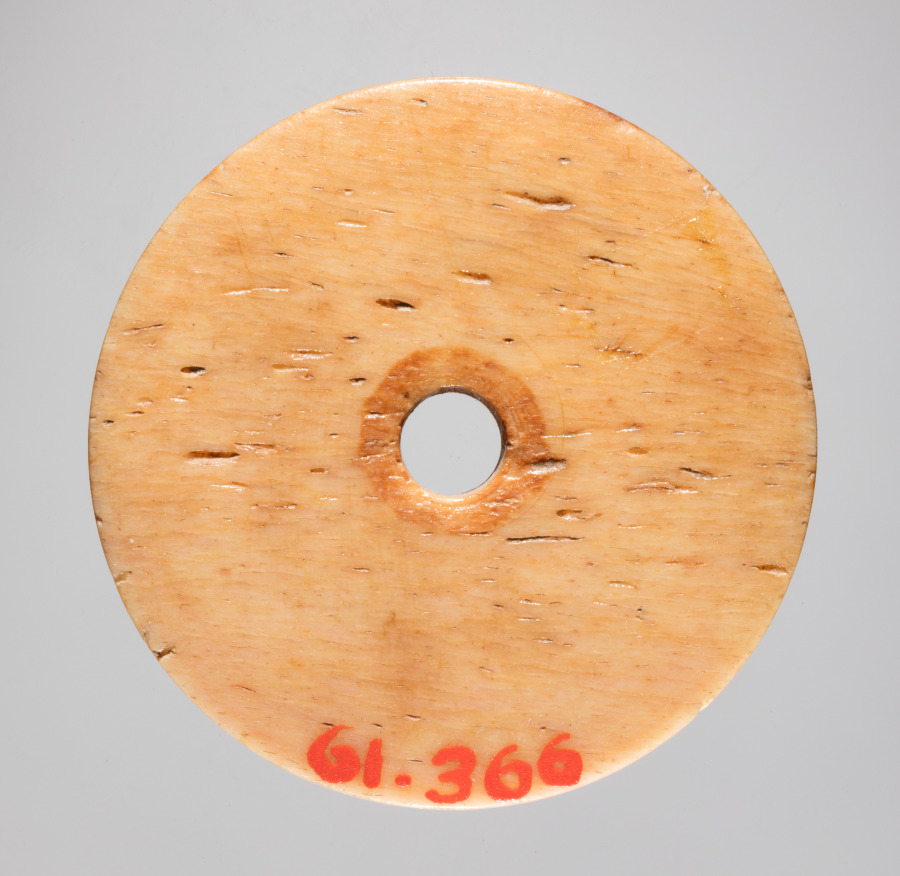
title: Spindle Whorl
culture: Iran, early Islamic period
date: 700s - 900s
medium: bone, incised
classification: Spindle Whorl